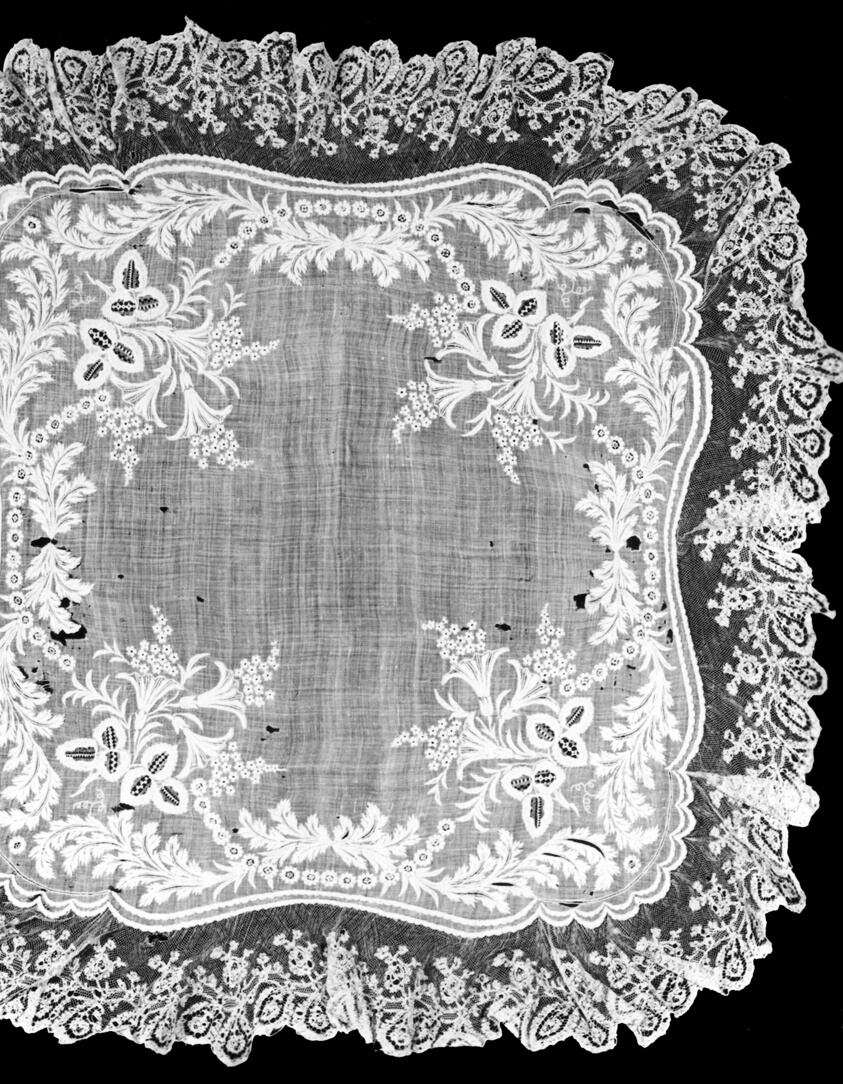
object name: Textile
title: Handkerchief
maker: Probably France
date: 1850/75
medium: Linen, plain weave; cut work embroidered with linen in needle lace fillings; and embroidered with cotton in back, buttonhole, padded overcast, padded satin, and trammed ladder hem stitches; laid work and couching; edged with cotton and linen, Leavers machine lace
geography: France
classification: textile; accessories (object genre); weaving; needlework (visual works); lace